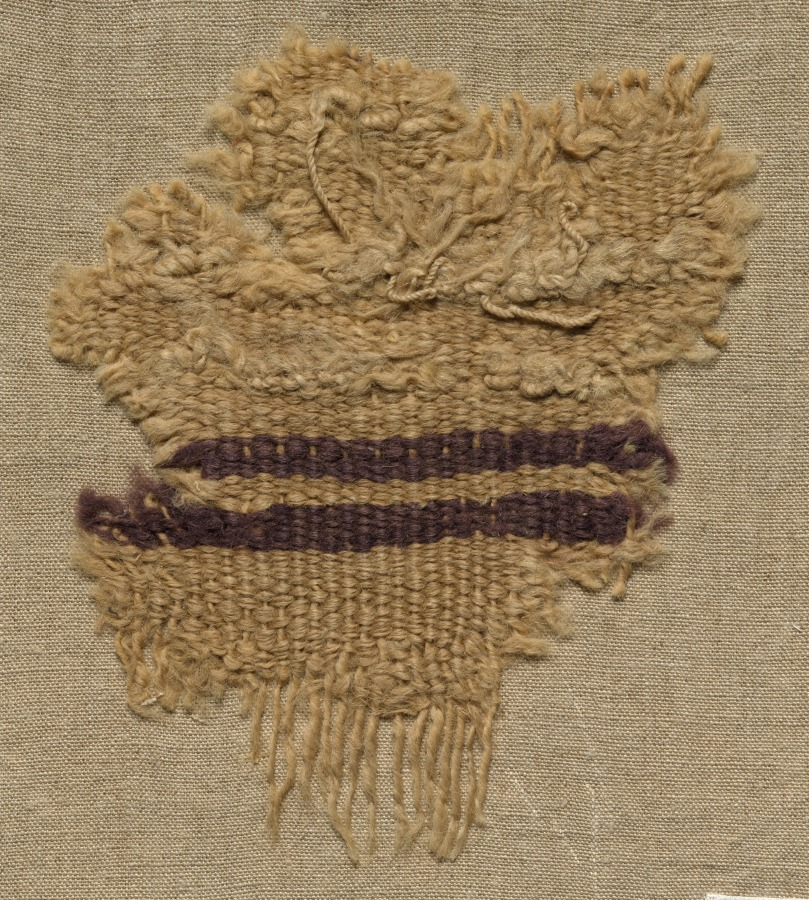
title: Wool Fragment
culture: Syria, Dura-Europos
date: 200s CE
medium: wool: tapestry with sehna loops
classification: Textile